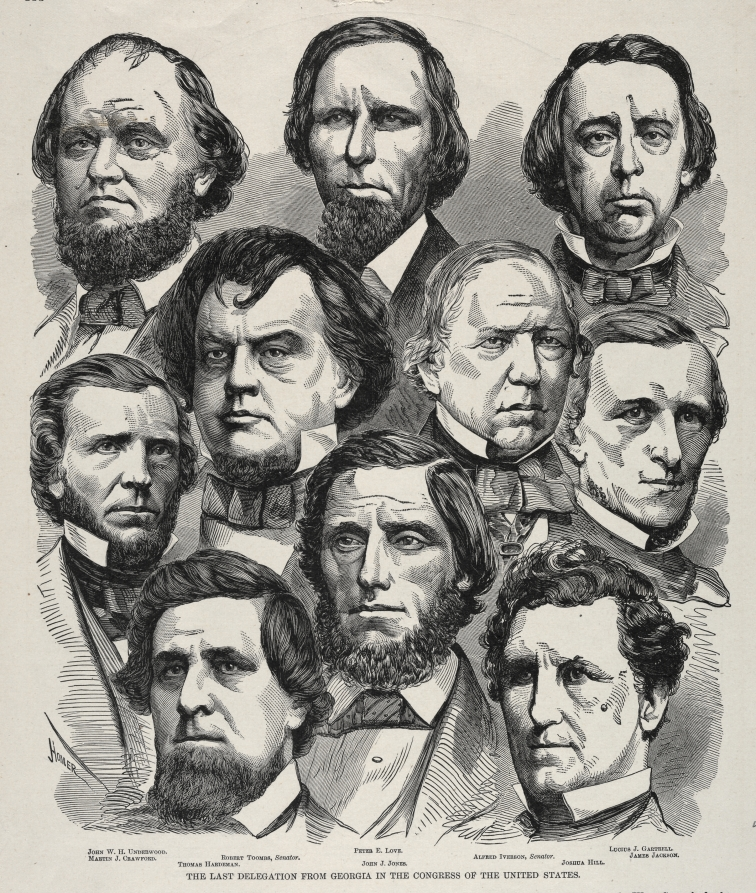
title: The Last Delegation from Georgia in the Congress of the United States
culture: America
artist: Winslow Homer (American, 1836–1910)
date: 1860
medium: wood engraving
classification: Print